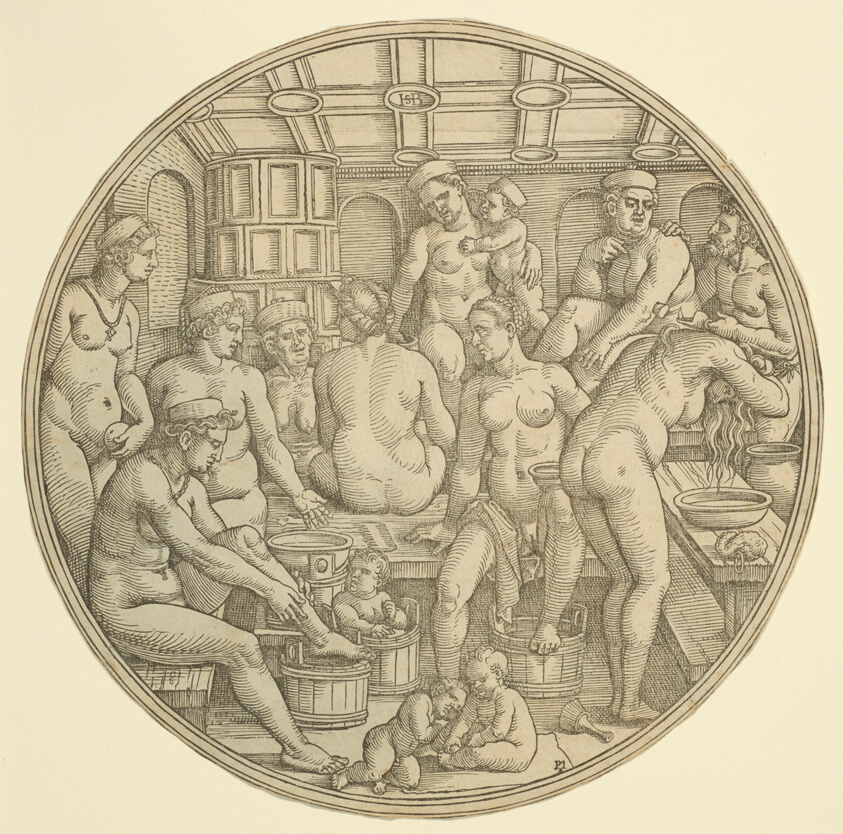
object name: Print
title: The Women's Bath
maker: Sebald Beham; German, 1500-1550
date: 1530/40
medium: Woodcut in black, with touches of brush and black ink, on cream laid paper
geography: Germany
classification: woodcut; print; prints and drawing